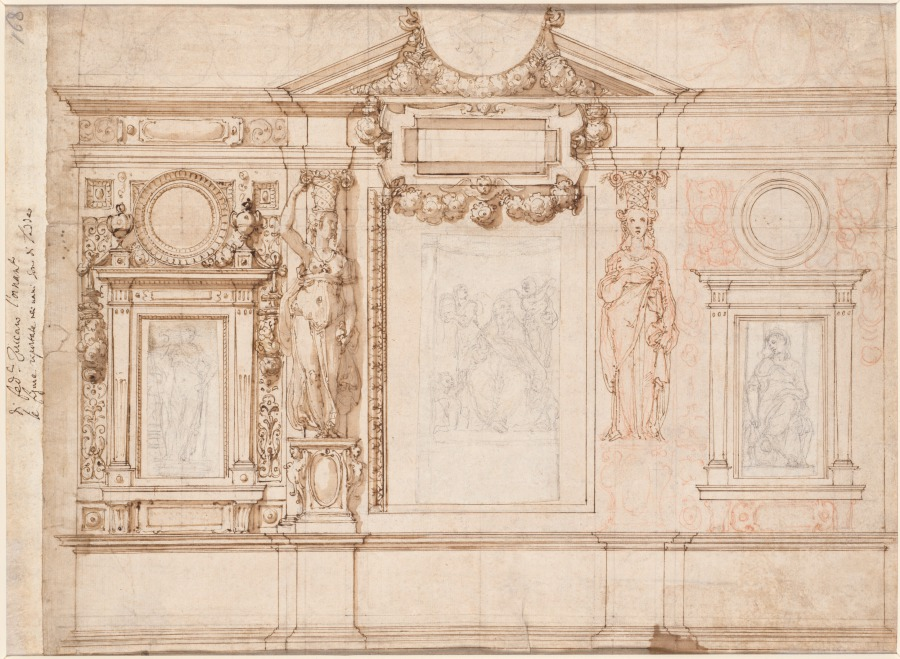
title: Design for a Wall Decoration with Pasted-in Sketches after Raphael (verso)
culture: Italy, 16th century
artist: Frederico Zuccaro (Italian, 1540/1–1609)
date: c. 1580s-90s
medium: Pen and brown ink with brown wash over red chalk and traces of pencil, the three pasted-in compositional sketches in black chalk laid down on an album sheet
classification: Drawing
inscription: Annotated by Resta on the album sheet in pen and brown ink, left margin: di Fed. Zuccaro l'ornamt[i] / le figure riportate nei vani sono di Taddeo